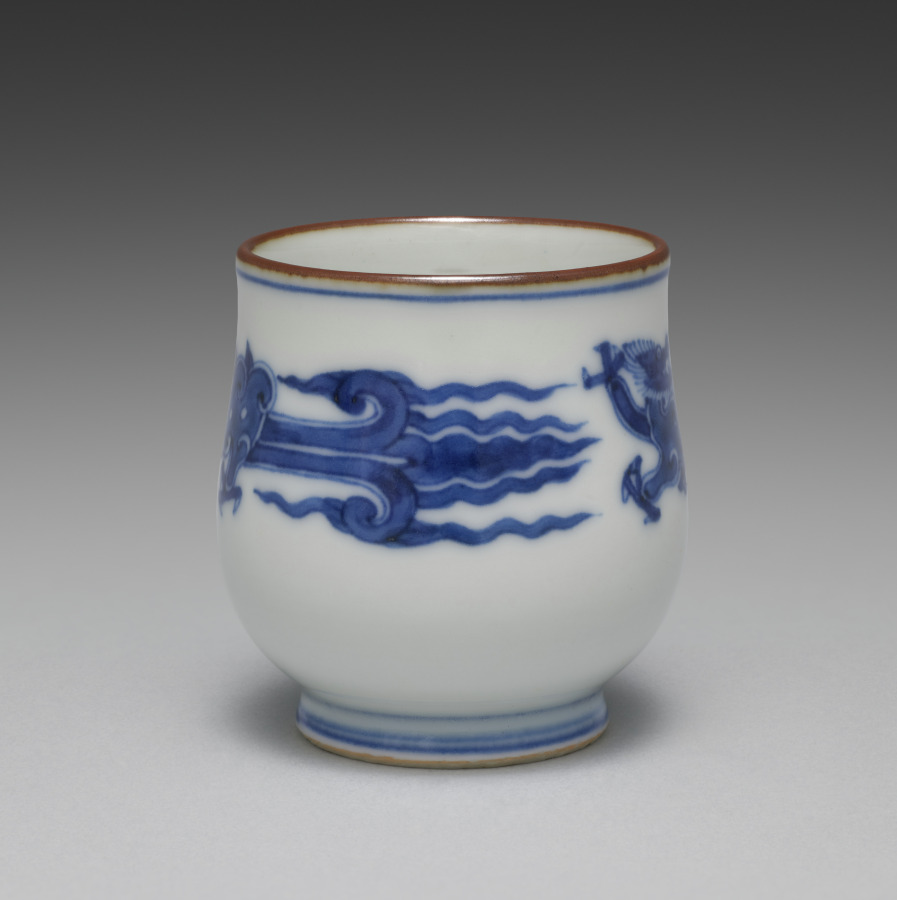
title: Cup from Sake Cups with Dragons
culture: Japan, Meiji period (1868–1912)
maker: Seifū Yohei III (Japanese, 1851–1914)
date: c. 1893–1914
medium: One from a set of six sake cups; porcelain with underglaze blue and iron oxide rims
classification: Ceramic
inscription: 大日本清風造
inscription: 清風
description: Each of these sake cups pictures two backward-looking dragons. The highly stylized creatures resemble jade carvings.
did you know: Seifū Yohei III was inspired by the Chinese mythical animals that were common on porcelain objects made at Jingdezhen in China during the Ming dynasty (1368–1644) and then exported around the world.